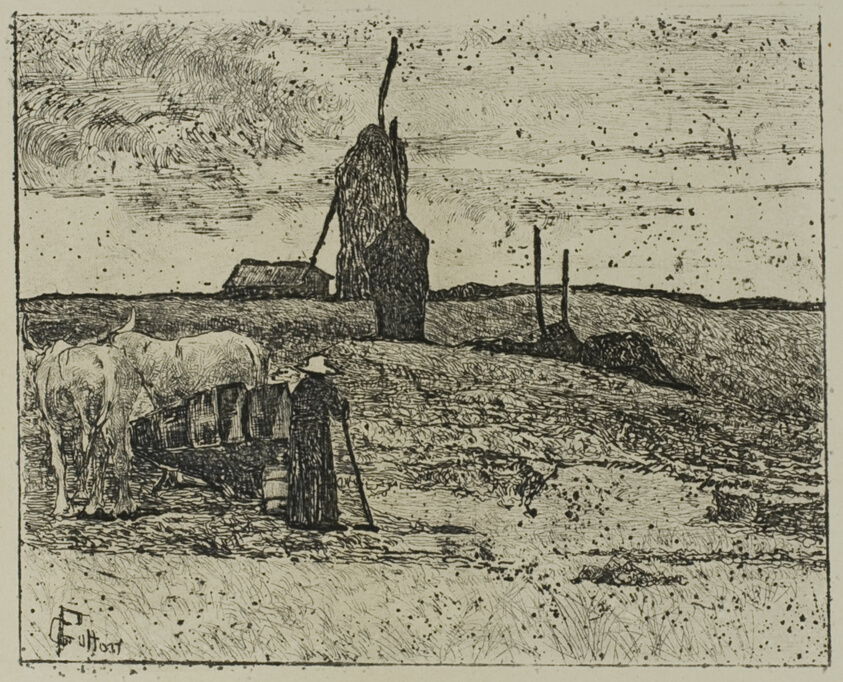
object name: Print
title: Maremma in Tuscany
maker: Giovanni Fattori (Italian, 1825-1908)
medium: Soft ground etching in black on cream wove paper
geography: Italy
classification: etching; paper; print; prints and drawing